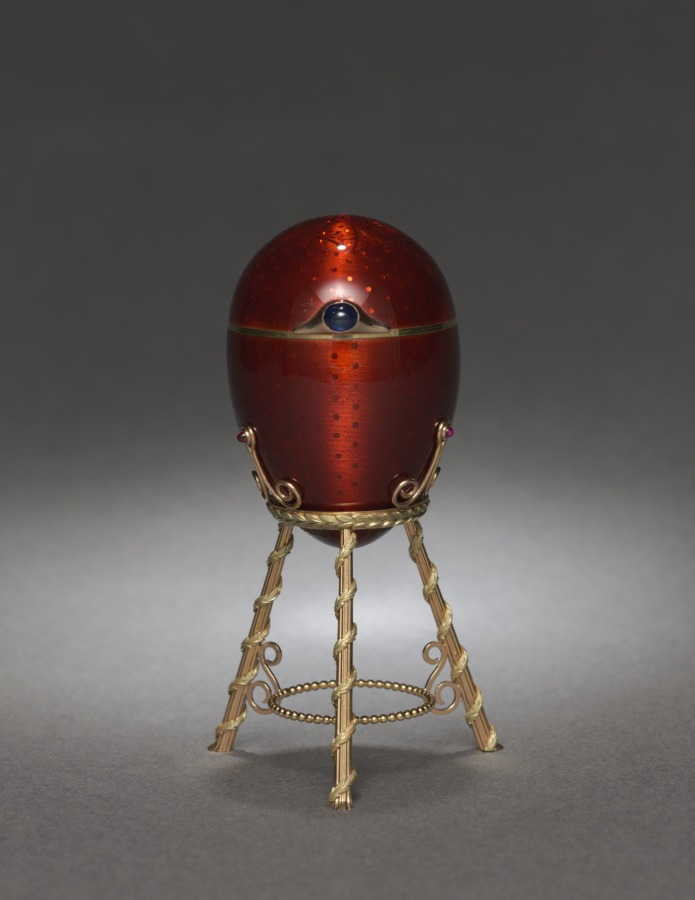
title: Egg on Stand with Easel and Photograph of Tsarevich Alexei Nikolaievich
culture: Russia, St. Petersburg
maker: Alexander Edward Tillander (Russian, 1837–1918)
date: c. 1890–1896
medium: gold, enamel, sapphire, gold easel and stand, paper, faceted green glass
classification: Miscellaneous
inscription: engraved beneath the enamel of the top are the Cyrillic letters "XB" [in monogram] which signify the phrase, "Christ is risen."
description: In the Russian Orthodox religious tradition, eggs are offered as Easter gifts to symbolize rebirth, renewal, and the resurrection of Christ. This jeweled Russian egg is engraved with XB symbolizing the phrase, “Christ is risen,” and would have been given to a lady in a wealthy household, perhaps someone of high rank within the imperial court, given the richness of materials.